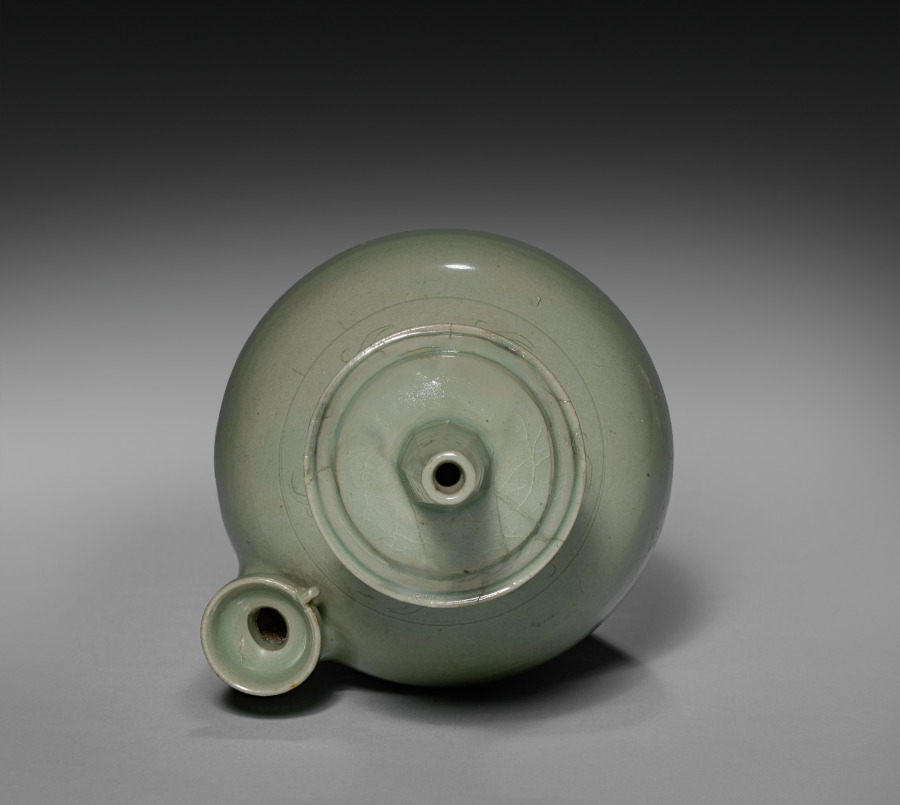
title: Water Ewer for Rituals with Incised Parrot Design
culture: Korea, Goryeo dynasty (918–1392)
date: 1100s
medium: stoneware with celadon glaze, incised and carved decoration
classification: Ceramic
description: This distinctively shaped celadon vessel is a kundika. With a spout on one side, this type of vessel is often used in Buddhist purification rituals. Unlike most existing examples that have an image of a willow tree, this work has a rare flying phoenix design incised on its surface.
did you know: This distinctively shaped vessel is called a kundika in Sanskrit, simply referring to a water bottle.